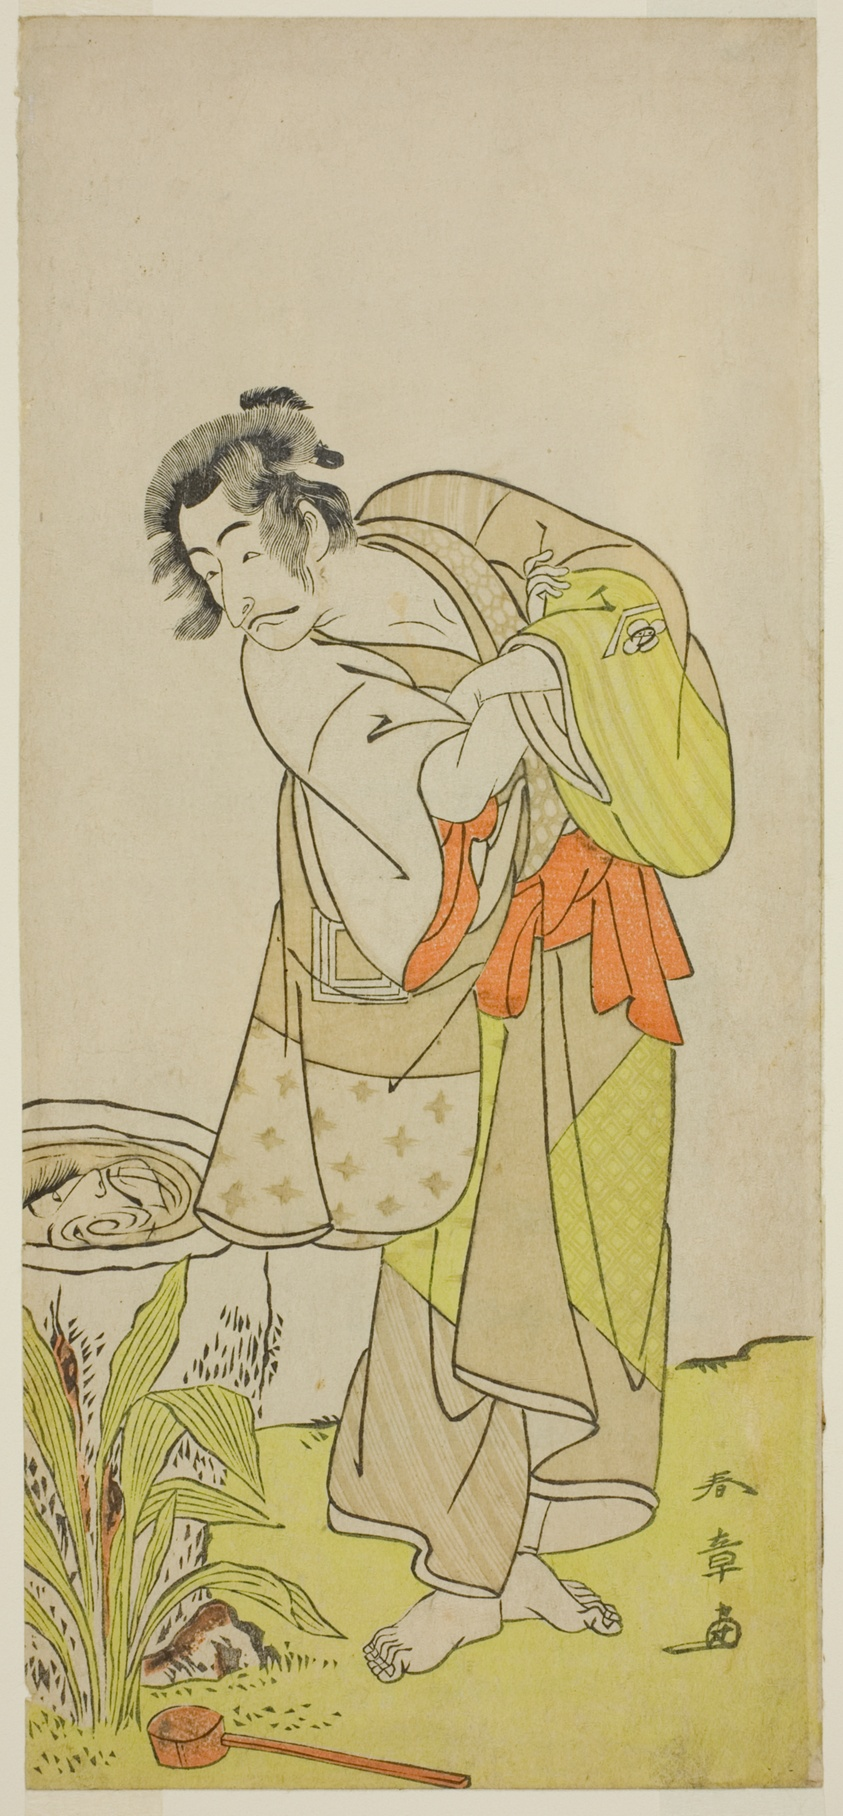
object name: Print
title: The Actor Ichikawa Danjuro V as Soga no Dozaburo (?) in the Play Shida Yuzuriha Horai Soga (?), Performed at the Morita Theater (?) in the First Month, 1775 (?)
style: Japanese (culture or style)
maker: Katsukawa Shunsho 勝川 春章; Japanese, 1726-1792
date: c. 1775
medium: Color woodblock print; hosoban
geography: Japan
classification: woodblock print; print; asian art